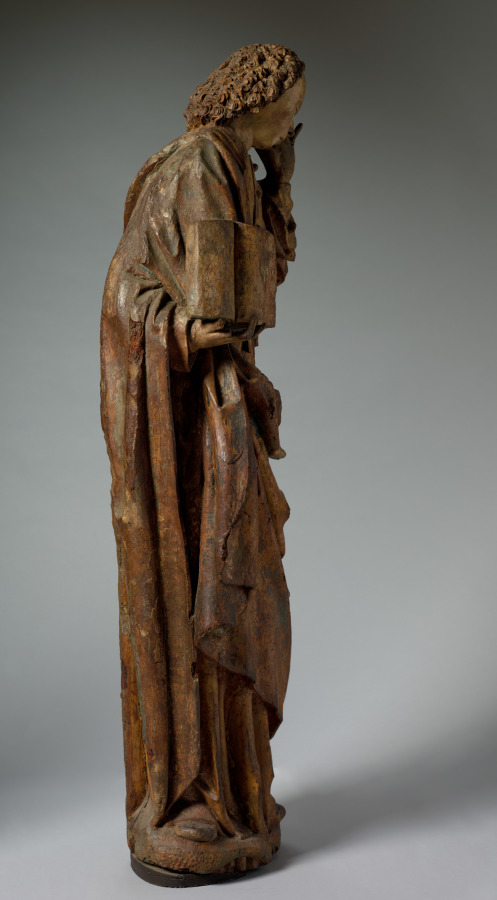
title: Saint John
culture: France, 15th century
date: 1450–1499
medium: wood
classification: Sculpture